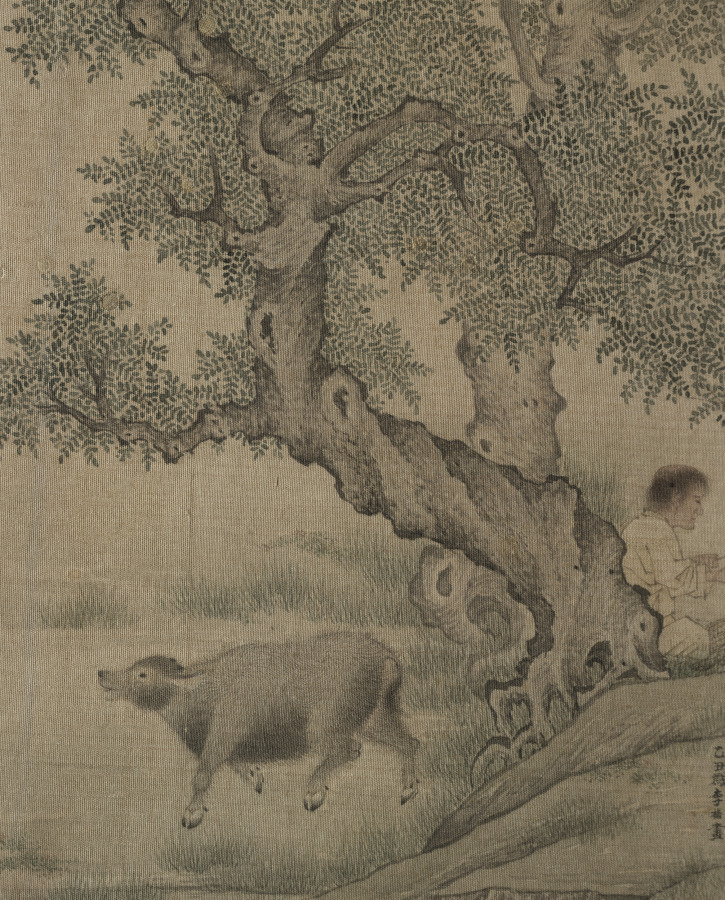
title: Man, Buffalo, and Calf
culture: China, Southern Song dynasty (1127-1279)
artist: Li You (Chinese, active c. 1145)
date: 1145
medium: album leaf; ink and color on silk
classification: Painting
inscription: Artist's inscription: 乙丑歲李祐/椿畫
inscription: 3 seals: 1 of Wu T'ing (c. 1600); 1 of An Kuo (1481–1534); 1 of Li Pao-hsün (1858–1915)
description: Here, a herdboy tending a cow with a calf is sitting beneath a tree with his pet myna bird. The painting can be read as a pastoral scene. As the water buffalo helped plow the fields, it was perceived as an animal that endures hard work without gain for itself, often interpreted as a metaphor for the official. Ox-herding pictures, presented as gifts in court circles, were used for their moral and political rhetoric. The Yijing (Book of Changes) states, The Receptive is the earth, the mother . . . it is a cow with a calf . . . the multitude [in relation to the ruler].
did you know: Li You included such tiny details as circular patterns of hair on the buffalo’s hindquarters.